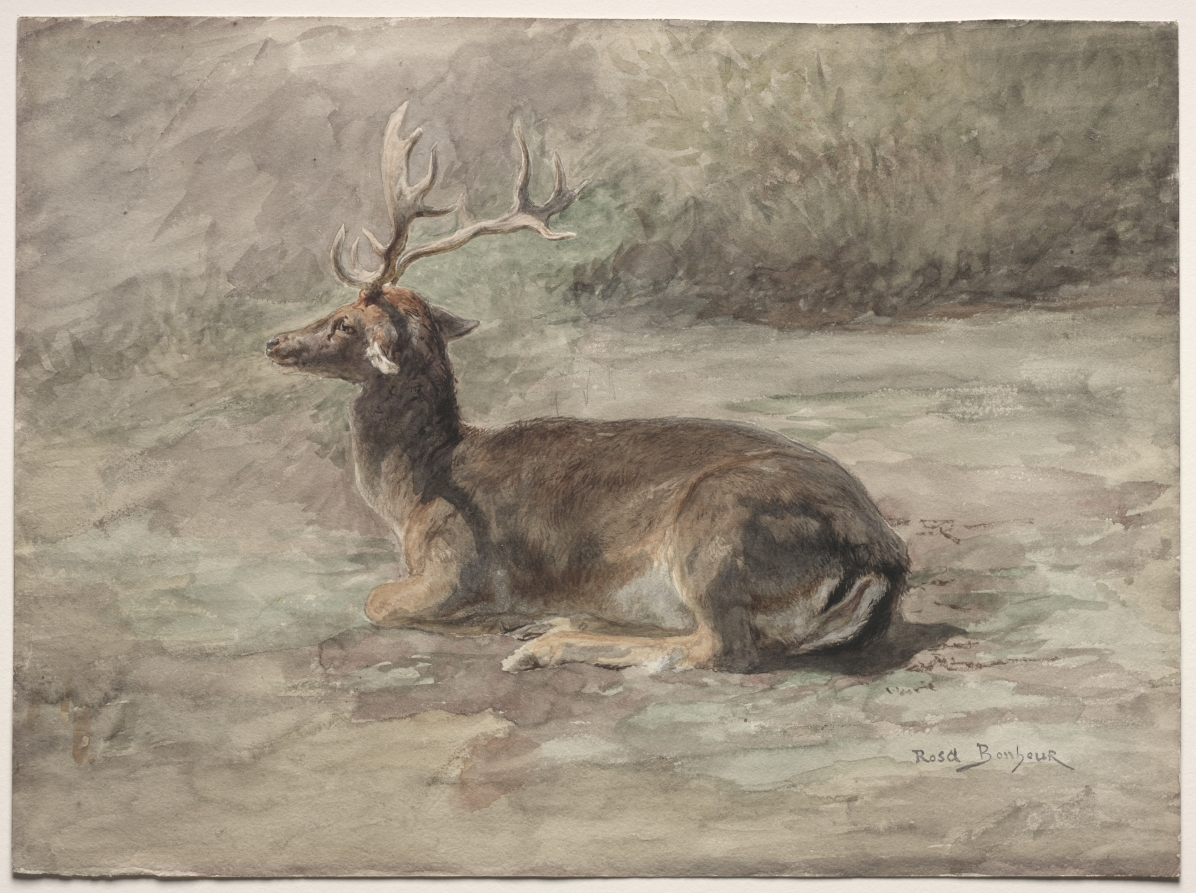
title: Stag Lying Down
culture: France, 19th century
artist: Rosa Bonheur (French, 1822–1899)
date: c. 1875–85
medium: watercolor and gouache over graphite on cream wove paper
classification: Drawing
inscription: stamped, in black ink, at lower right: artist's estate stamp [Lugt 274]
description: This drawing was among many representing stags that were discovered in Rosa Bonheur’s studio after her death. One of the few women of her time who was given the support needed for an artistic career, Bonheur became famous during her lifetime for naturalistic portrayals of animals. Daily carriage rides through the forest around her home enabled her to sketch from nature. One such outing inspired Cleveland’s drawing: Bonheur’s companion recalled “a stag . . . with the sun playing on him through the leaves . . . [who] remained perfectly still.” Watercolor was ideal for such improvisatory studies, allowing Bonheur to work outdoors alongside the subjects she treasured.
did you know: Bonheur constructed a park to house a stag named Jacques, whom she kept as a pet and model.